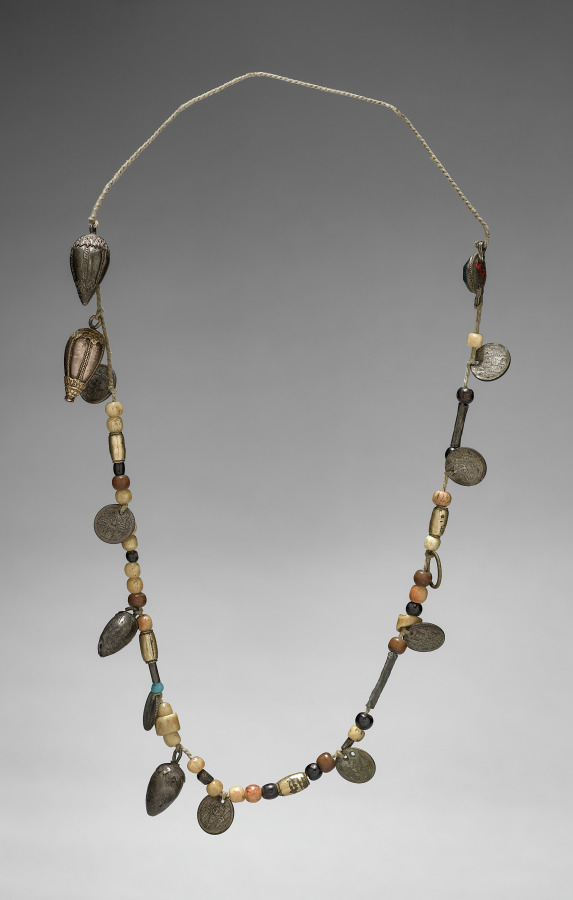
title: Necklace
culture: Siam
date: 1800s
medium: coins, bone, silver and gold beads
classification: Jewelry